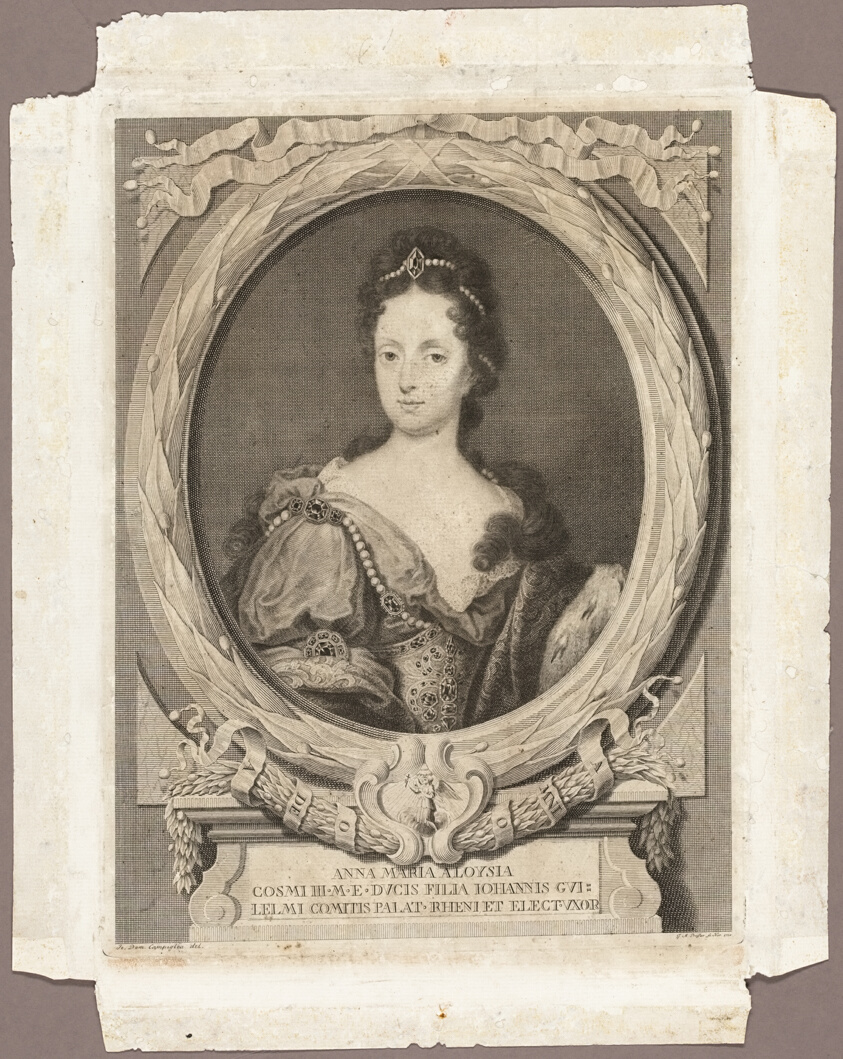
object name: Print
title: Anna Maria Luisa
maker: Georg Martin Preissler (German, 1700-1754); after Giovanni Domenico Campiglia (Italian, 1692-1768); published by Giuseppe Allegrini, Florence, 1761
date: 1730; published 1761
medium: Engraving on ivory laid paper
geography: Germany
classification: engraving; paper; print; prints and drawing